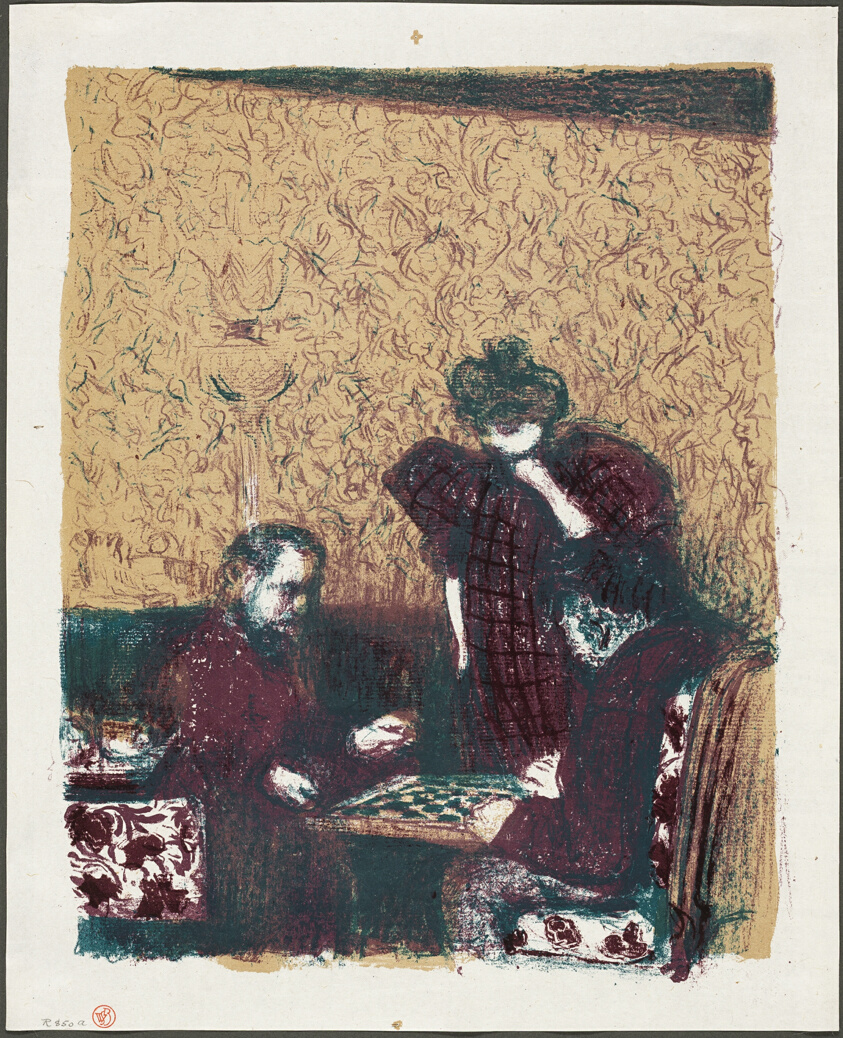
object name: Print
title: The Game of Checkers, plate one from Landscapes and Interiors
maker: Edouard Vuillard (French, 1868-1940); printed by Auguste Clot (French, 1858-1936); published by Ambroise Vollard (French, 1867-1939)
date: 1899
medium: Color lithograph on grayish-ivory China paper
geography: France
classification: lithograph; print; prints and drawing